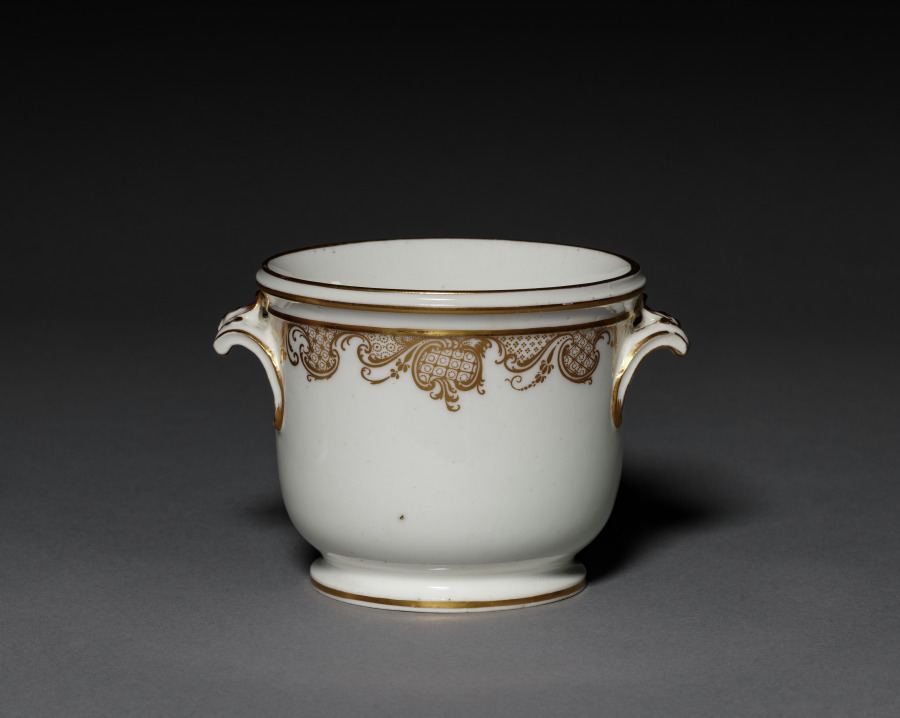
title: Flower Pot (2 of 2)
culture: France, Vincennes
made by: Vincennes Porcelain Factory (France, 1740–56)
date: 1745–53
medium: soft-paste porcelain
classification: Ceramic